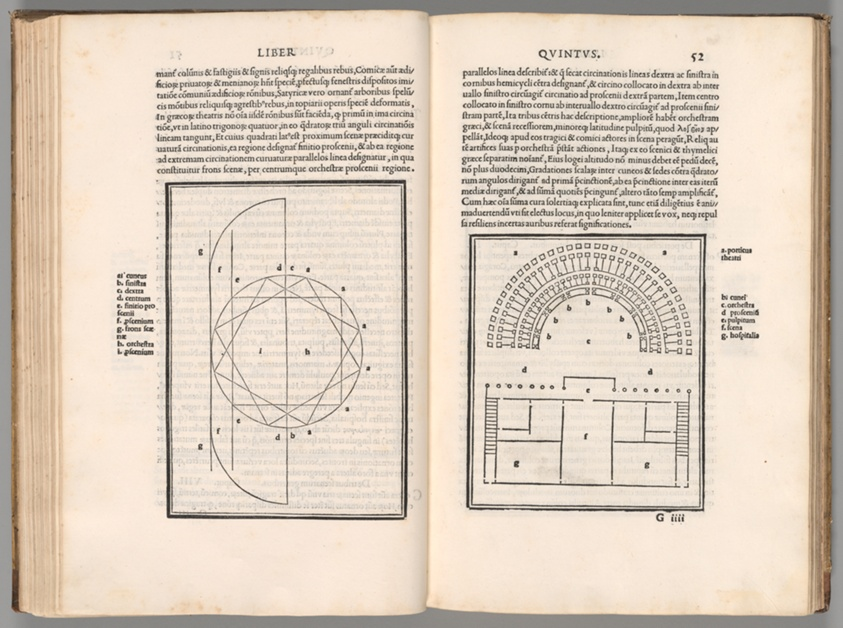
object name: Book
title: De Architectura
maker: Marcus Vitruvius Pollio (Roman, active first century BCE)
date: Venice, Italy: Ioannis de Tridino, also known as Tacuino, 1511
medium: Letterpress and woodcut in black on ivory laid paper; four-piece decorative woodcut title border with scrolling foliage and dolphin motifs; full alum-tawed ornamental leather binding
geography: Italy